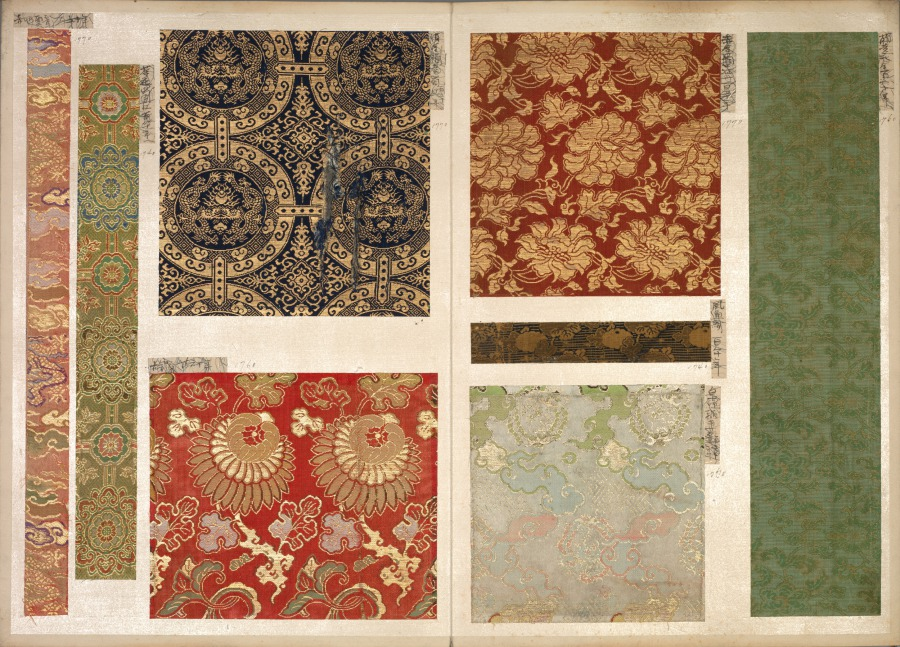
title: Album of Textile Samples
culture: Japan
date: 1790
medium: silk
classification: Textile